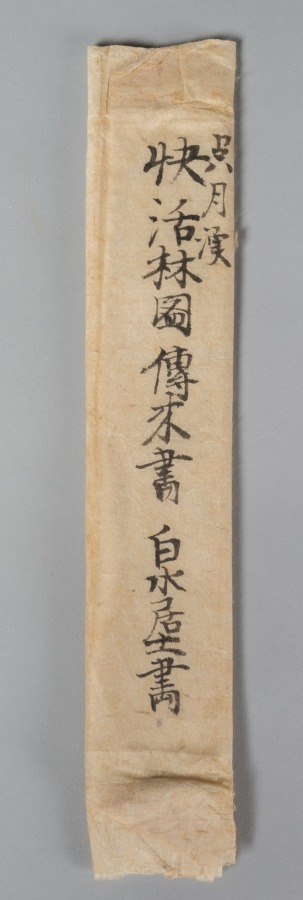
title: Happy Forest, from Water Margin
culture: Japan, Edo period (1615–1868)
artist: Matsumura Goshun (Japanese, 1752–1811)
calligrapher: and Amenomori Shōteki (Japanese, 1731–1786)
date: late 1700s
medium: hanging scroll; ink and color on paper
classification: Painting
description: The Chinese literary classic Water Margin is set in the 1120s and tells the story of 108 outlaws who first rebel against the government and then join forces with it. This painting depicts an episode in which hero Wu Song reclaims the tavern Happy Forest for its rightful owner, the prison warden’s son, Shi En. To prepare for the fight, Wu Song drinks a lot of wine. The painting was inscribed with a quote in which an ally describes Wu Song’s fighting style. It reads as follows: Where his twin fists rise, clouds and thunder roar, When his flying kick comes, wind and rain tremble.